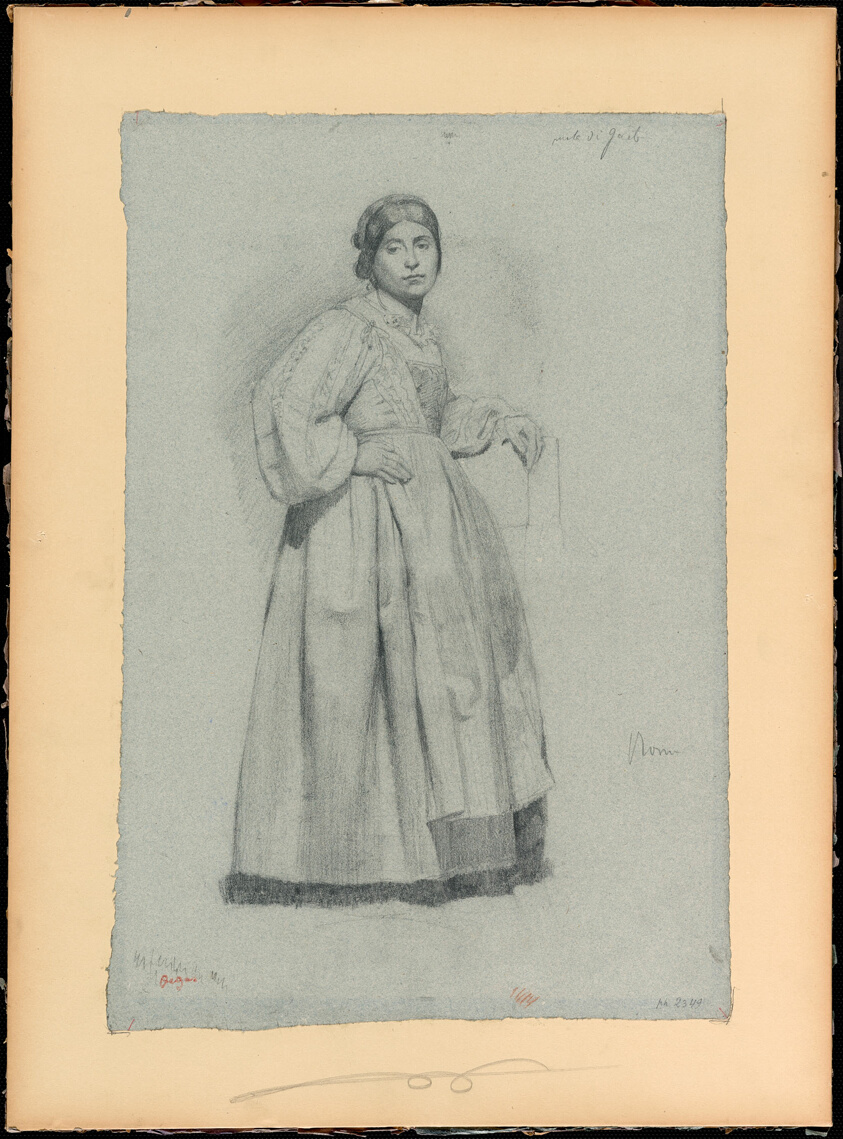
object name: Drawing and Watercolor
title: Italienne (Gaëta)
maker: Edgar Degas; French, 1834–1917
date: 1856/57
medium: Graphite, with stumping, on blue wove paper with blue fibers, perimeter-mounted on cream wove paper wrapped around millboard (touch of red chalk)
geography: France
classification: prints and drawing; graphite; drawings (visual works); paper